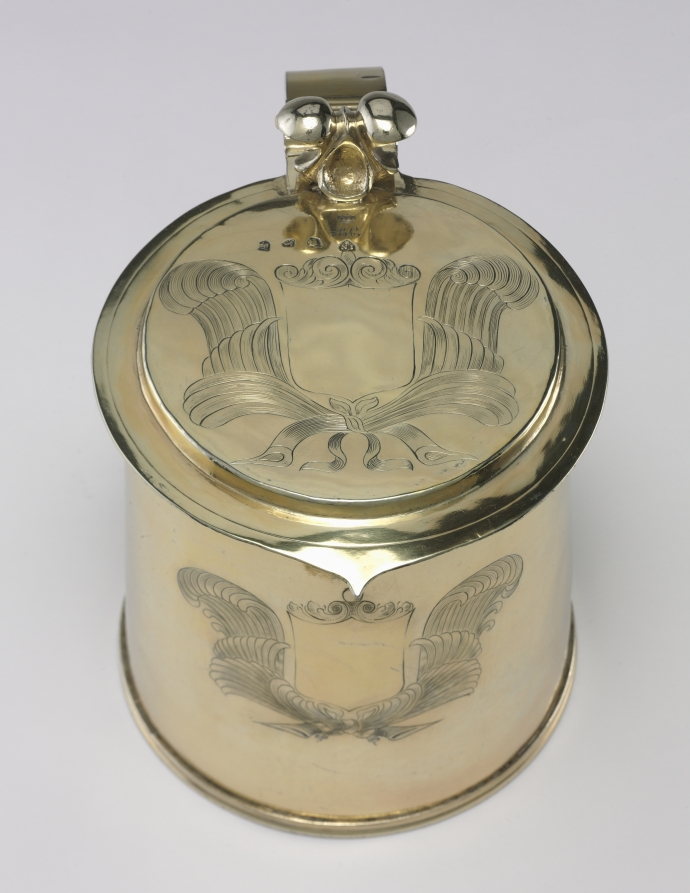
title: Tankard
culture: England, London, 17th century (Charles II)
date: 1665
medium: silver gilt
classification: Silver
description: Silver fulfilled a prominent role in projecting wealth, status, power, and ritual in British life during the 1600s and 1700s. Elaborate forms such as two-handled cups, trophies, trays, and centerpieces not only represented wealth in their sheer silver weight but also provided royal and aristocratic owners a surface for displaying engraved coats of arms, projecting identity and social status. Less wealthy individuals made do with more functional items such as this tankard. The empty cartouches on the drinking vessel suggest that it was produced without a specific patron in mind and that a coat of arms was intended to be added at a later time.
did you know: Tankards, with their characteristic hinged covers, scroll handles, and lobed thumbpieces, were used to drink beer or ale.